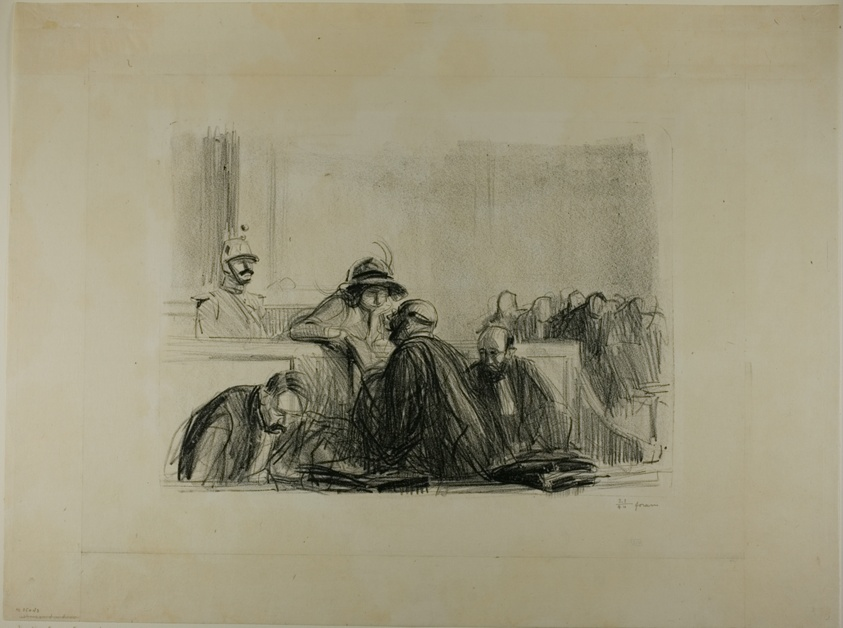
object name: Print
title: Legal Advice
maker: Jean Louis Forain (French, 1852-1931)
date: 1915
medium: Lithograph on ivory Japanese paper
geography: France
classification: lithograph; print; prints and drawing